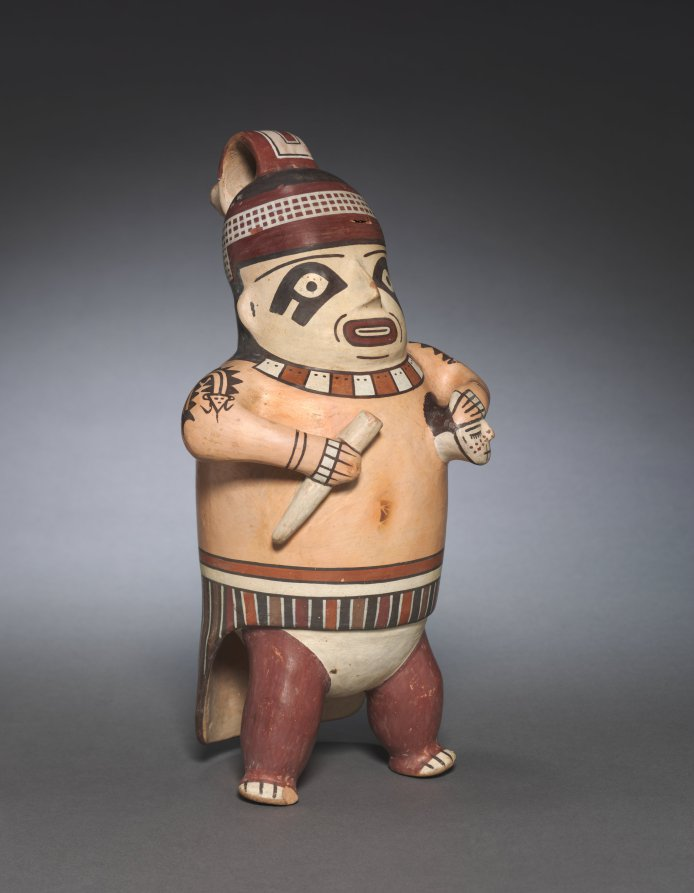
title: Male Effigy Vessel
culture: Peru, South Coast, Nasca, Early Intermediate Period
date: 100–650 CE (thermoluminescence date, 410–1010 CE)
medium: ceramic and slip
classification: Ceramic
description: The style is typically Nasca: modeling is minimal and the surface is decorated with the vibrant, earth-colored slips that are a hallmark of Nasca ceramic art. Male figures are a well-known category of Nasca ceramic production, although the shape of this one, which stands upright on two legs and is additionally supported from behind by a long loincloth, is unusual.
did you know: This figure holds a human head, which the Nasca viewed as a source of great power.